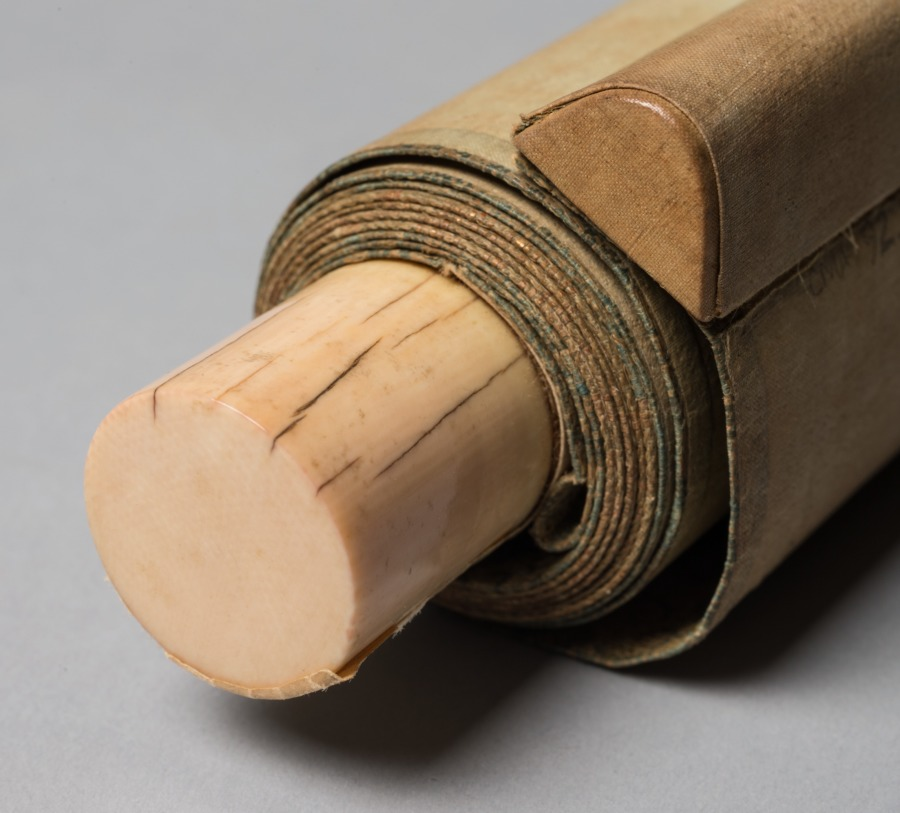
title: Turtle in a Lotus Pond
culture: Japan, Edo period (1615–1868)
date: 1700s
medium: hanging scroll; ink on paper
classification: Painting